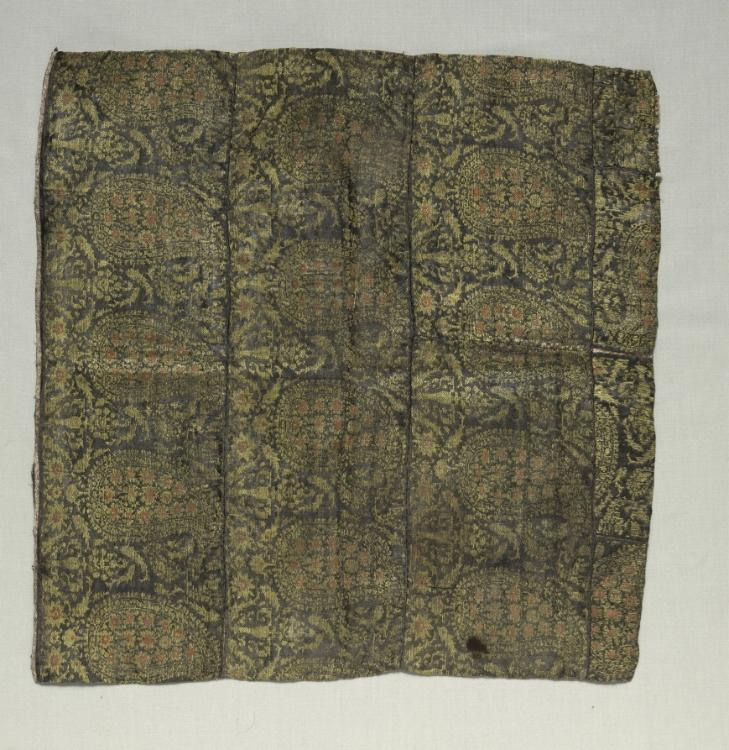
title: Table Square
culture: Iran, 18th century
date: 1700s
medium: lampas weave; silk and silver thread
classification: Textile